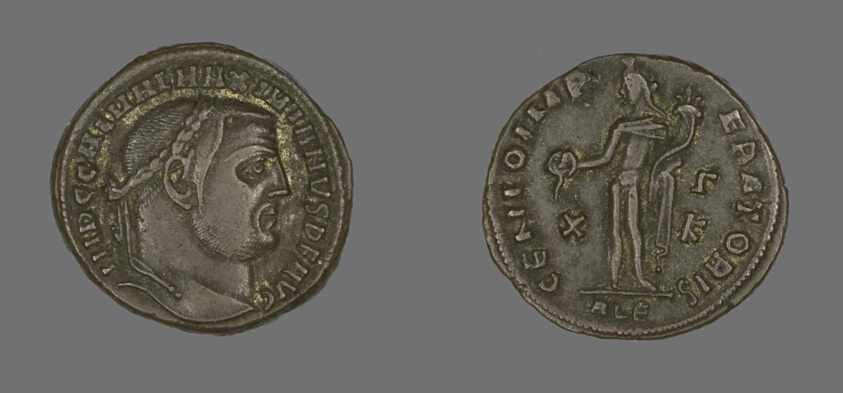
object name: Coin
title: As (Coin) Portraying Emperor Galerius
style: greco-roman, greco-roman (egyptian)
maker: Roman, minted in Alexandria, Egypt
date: 308-310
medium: Bronze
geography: Ancient Mediterranean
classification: coin; ancient art